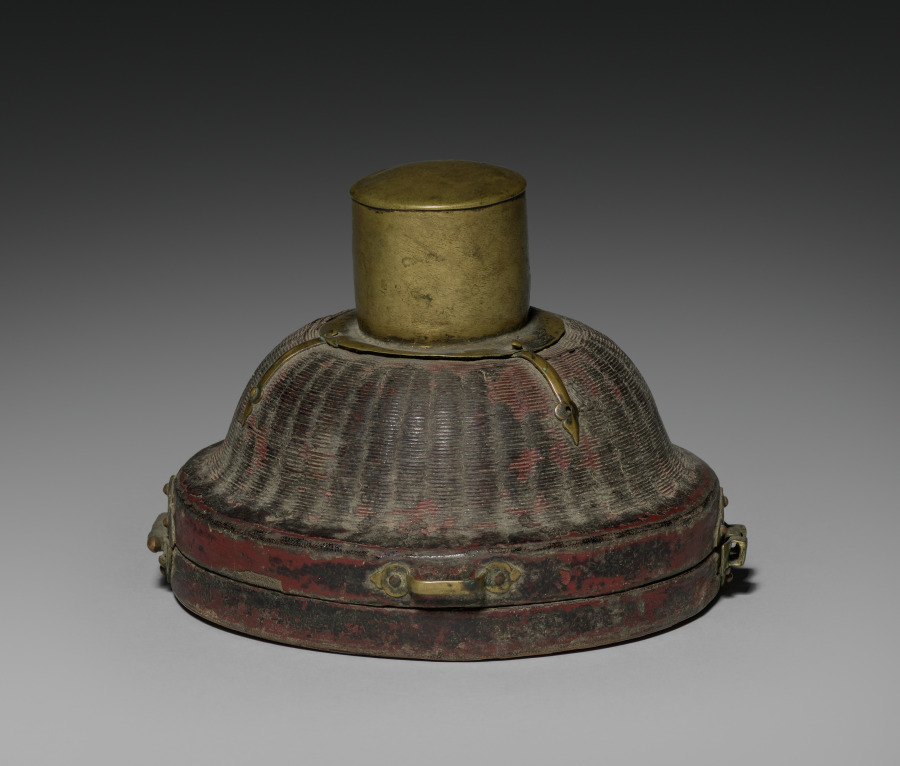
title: Stem Cup with Buddhist Emblems (case)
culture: China, Yuan dynasty (1271-1368)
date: 1300s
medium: wicker and wood with metal fittings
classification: Miscellaneous